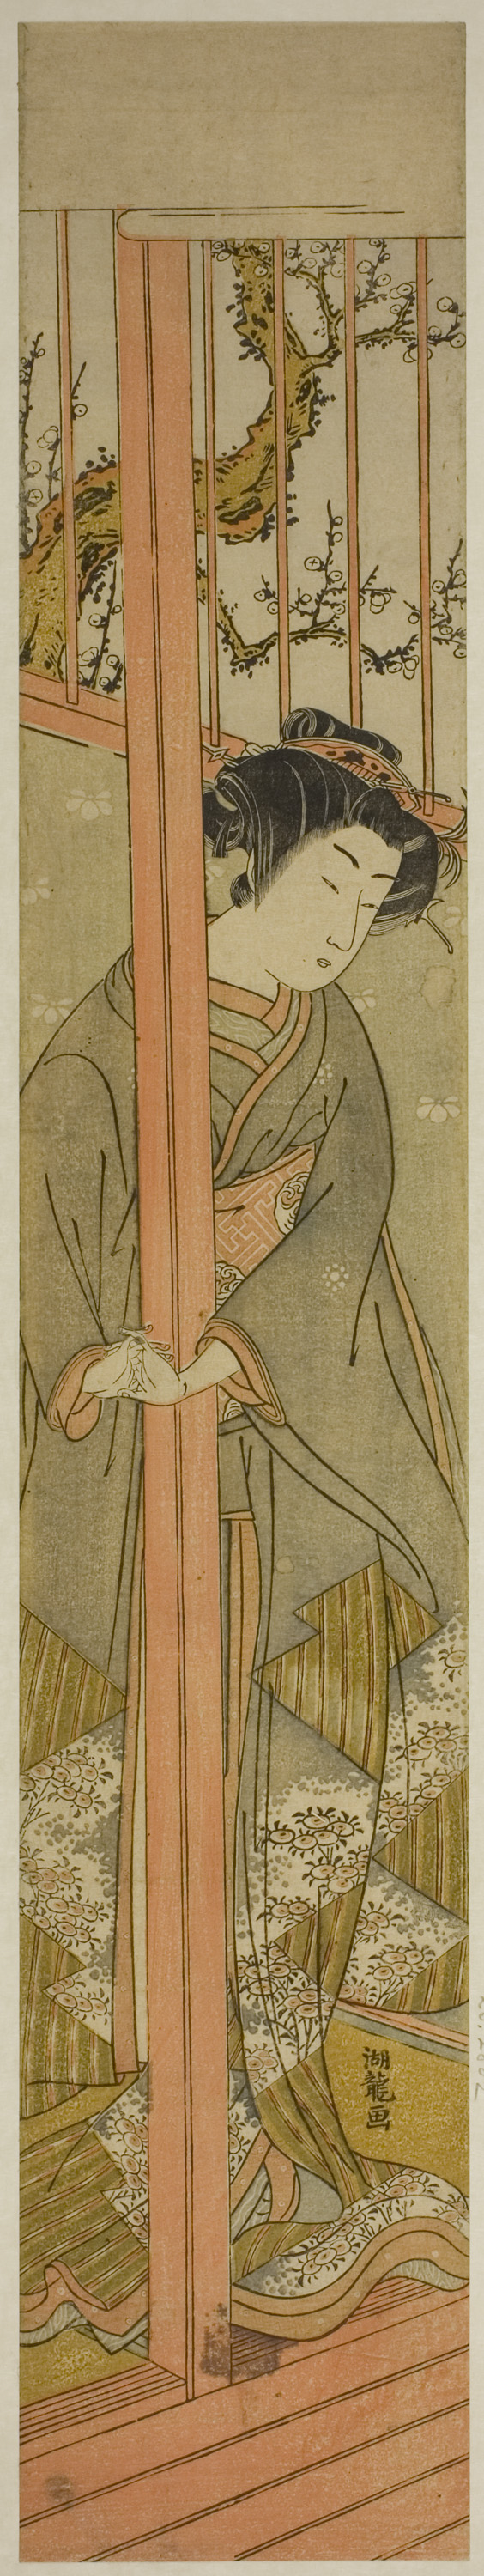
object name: Print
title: Young Woman Looking out from a Parlor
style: Japanese (culture or style)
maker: Isoda Koryusai (Japanese, 1735-1790)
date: c. 1776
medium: Color woodblock print; hashira-e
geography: Japan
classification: woodblock print; print; asian art